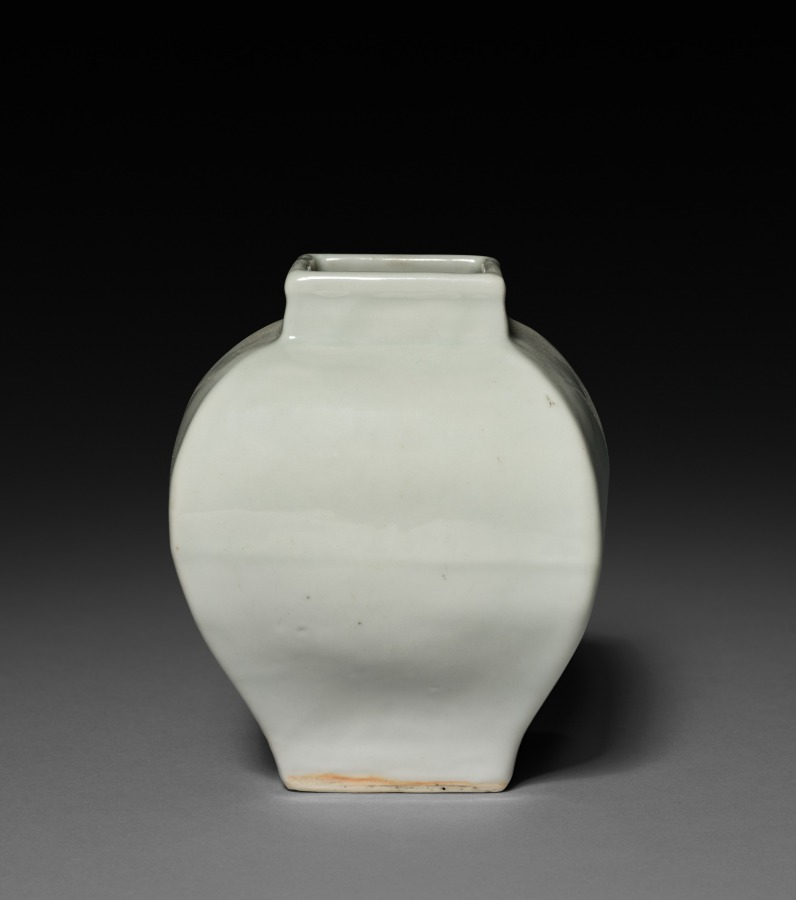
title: Square Jar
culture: China, Jiangxi province, Jingdezhen kilns, Ming dynasty (1368-1644), Jiajing mark and reign (1522-66)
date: 1522–66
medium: porcelain with white glaze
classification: Ceramic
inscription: 大明嘉靖年製